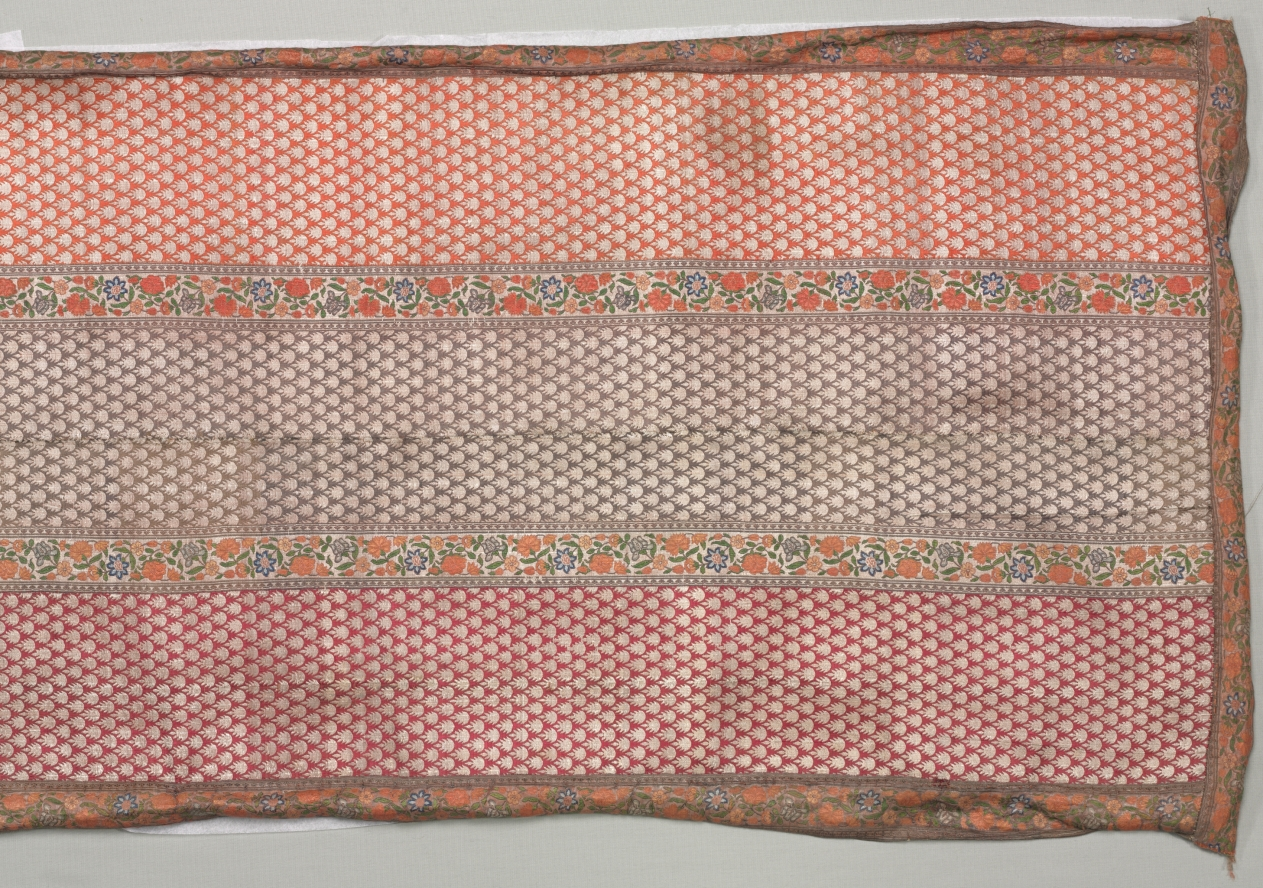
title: Sash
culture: Iran, 18th century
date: 1700s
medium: Silk taquete, brocaded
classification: Textile